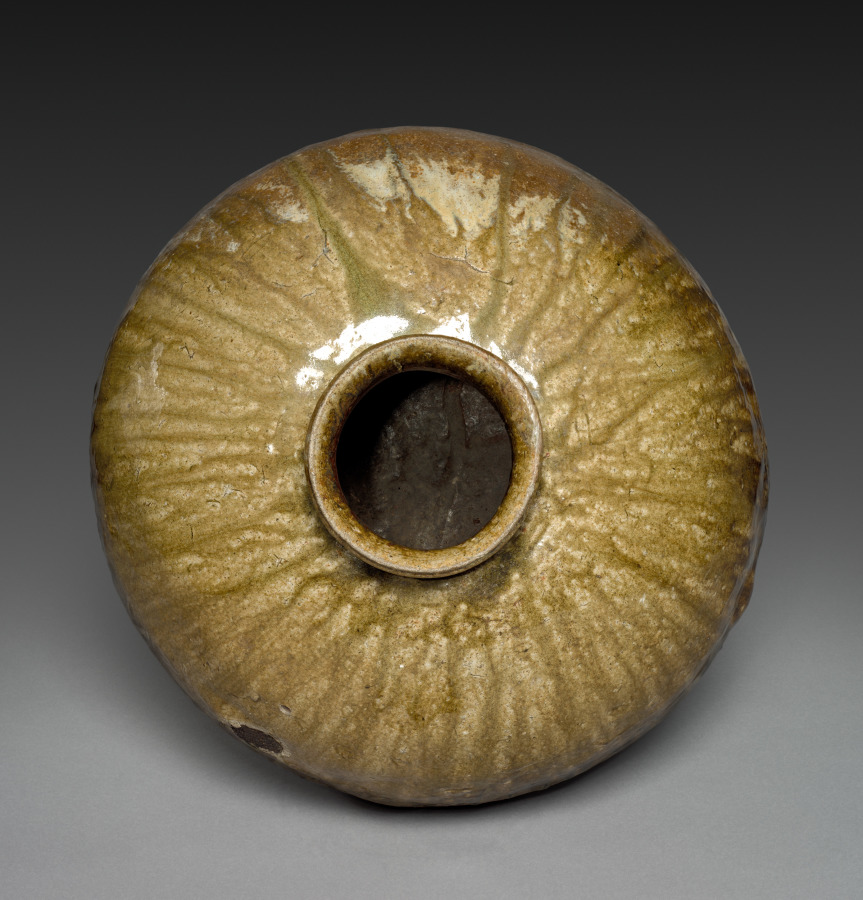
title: Storage Jar, Echizen Ware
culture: Japan, Muromachi period (1392–1573)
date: 1400s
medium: stoneware with natural ash glaze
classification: Ceramic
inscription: Incised artisan's mark